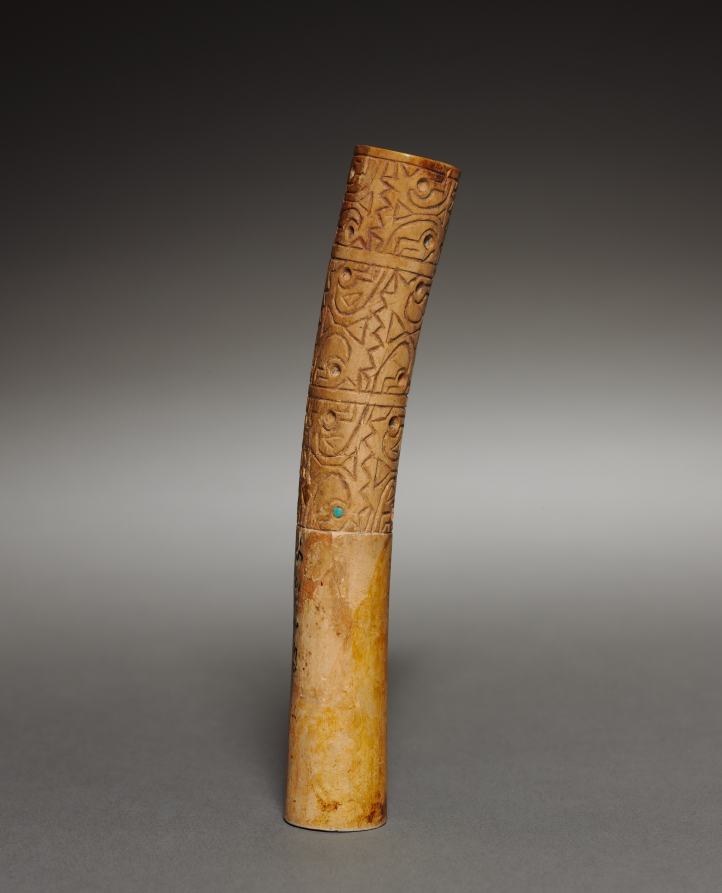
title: Ear Ornament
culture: Peru, Moche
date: 200–550 CE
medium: incised bone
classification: Jewelry